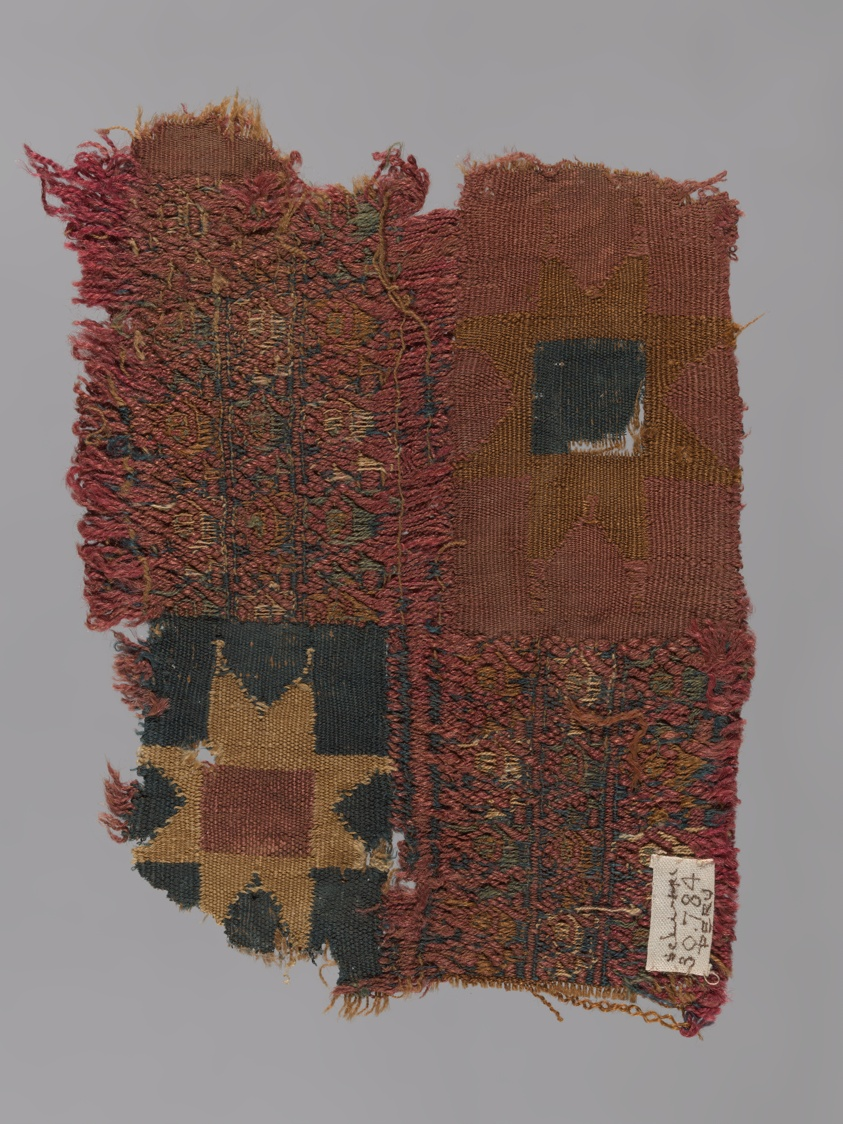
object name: Textile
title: Fragment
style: Chuquibamba, inca, late intermediate period, Pre-Columbian, americas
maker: Chuquibamba (Probably south coast, Peru)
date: A.D. 1476/1532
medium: Wool (camelid), interlocking tapestry weave and complementary weft weave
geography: Peru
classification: textile; weaving